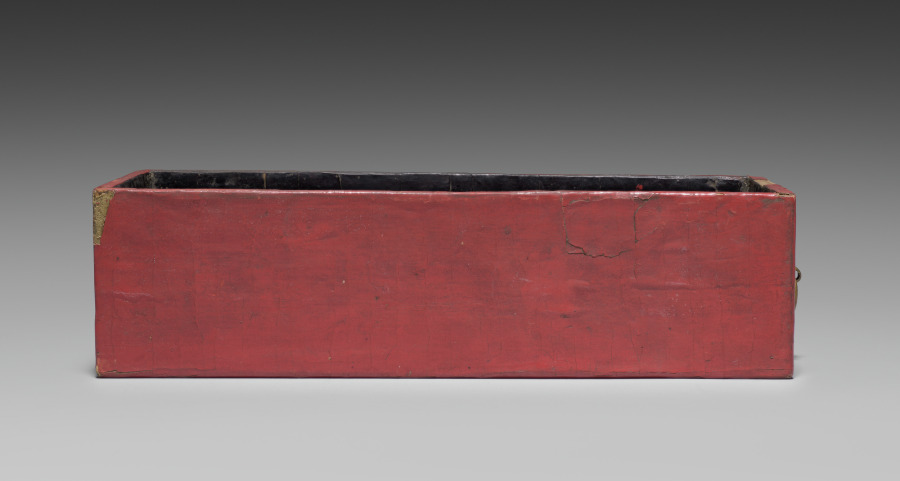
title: Drawer for a Tihong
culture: China, Ming dynasty (1368-1644), Wanli reign (1572-1620)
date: 1585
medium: carved cinnabar lacquer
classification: Lacquer